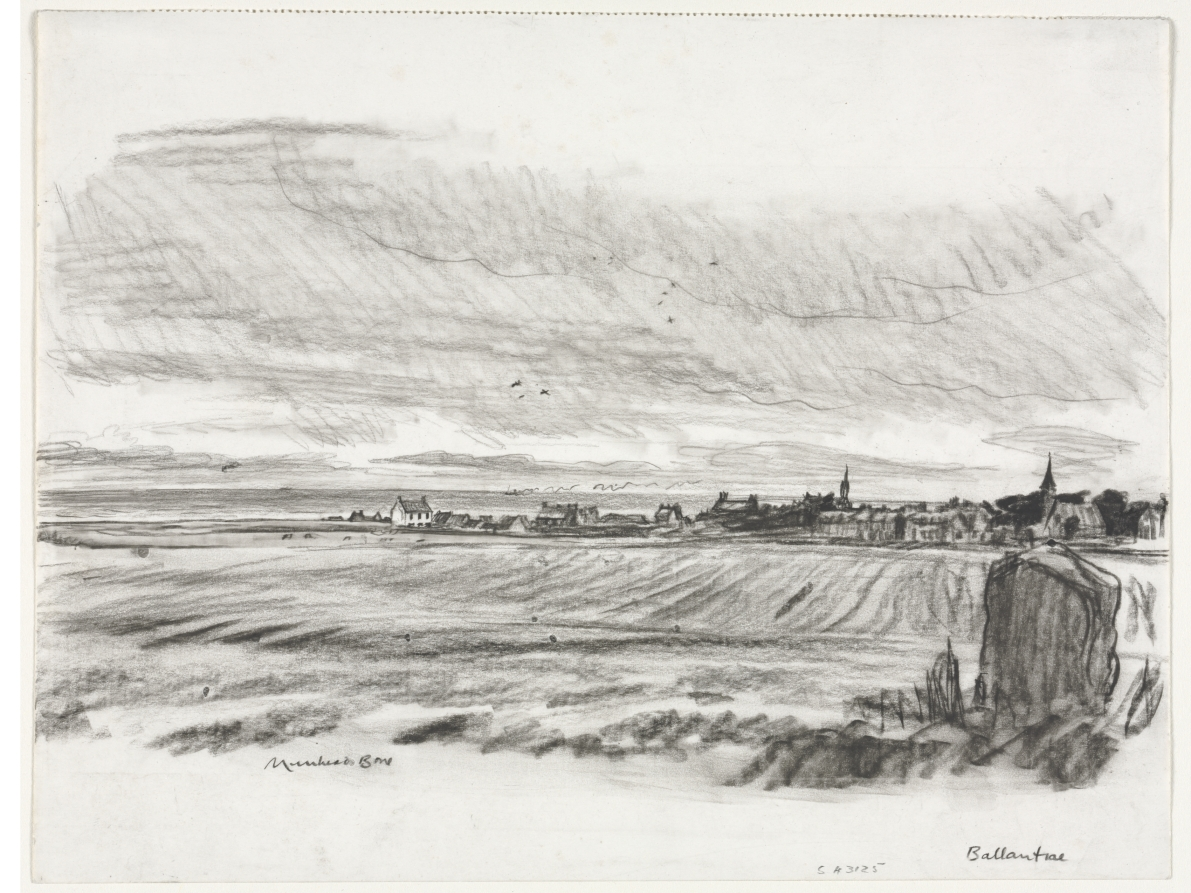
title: Ballantrae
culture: England, 20th century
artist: Muirhead Bone (British, 1876–1953)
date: c. 1907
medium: conté crayon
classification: Drawing